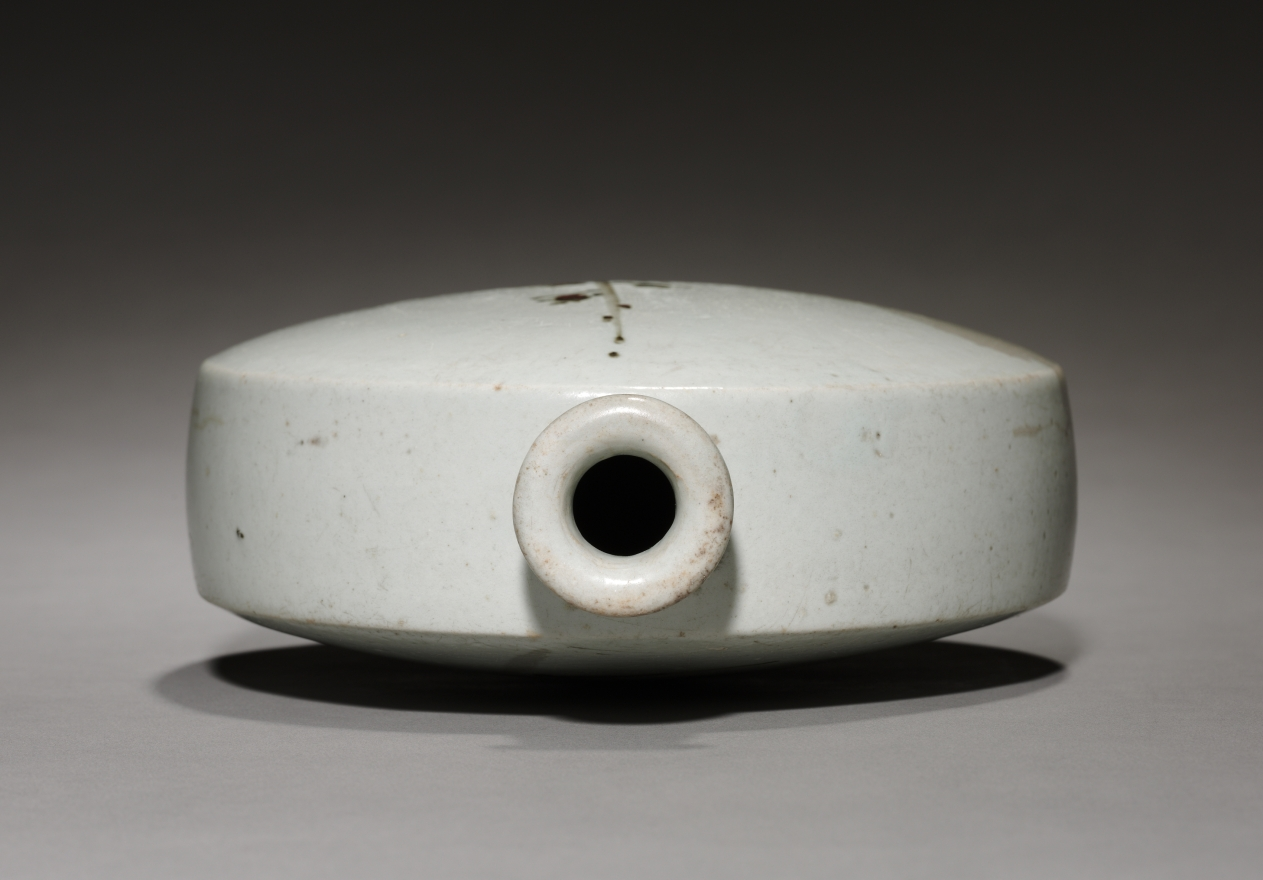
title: Wine Flask with Plum and Bamboo Design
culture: Korea, Joseon dynasty (1392–1910)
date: 1600s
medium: glazed porcelain with underglazed iron design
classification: Ceramic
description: This Korean wine flask embodies Lin Bu’s poetic line "Plums’ subtle scent pervades the moonlit dusk": its circular shape alludes to the full moon, and the gray color unintentionally spread on the flask’s lower part suggests the permeating scent of plum. The other side of the flask features a bamboo design. The plum and bamboo derive from the motif of the Four Gentlemen, which compares four plants to Confucian scholarjunzi, or "gentlemen."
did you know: The shape of this bottle can be traced all the way back to an ancient Persian pilgrim’s flask.